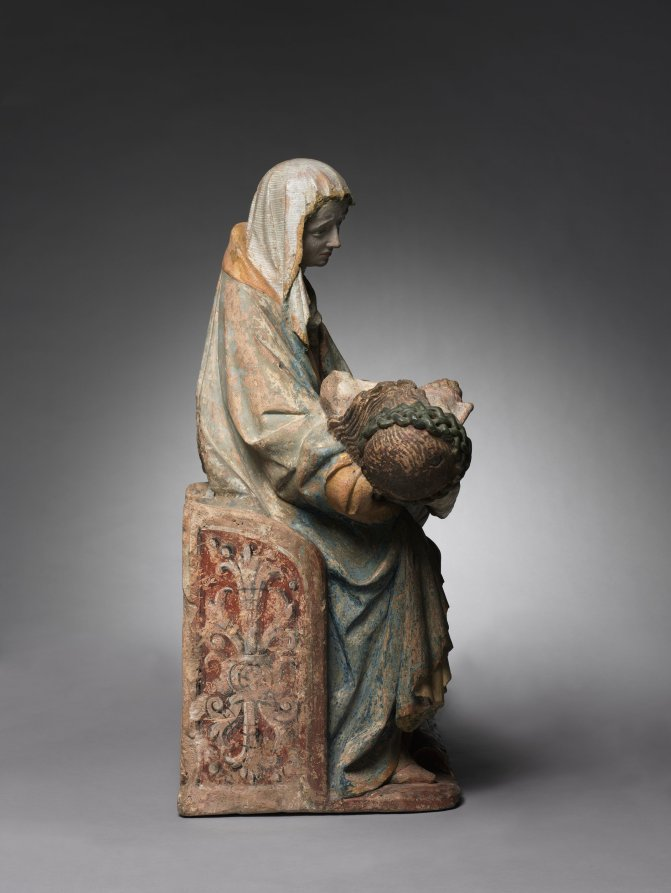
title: Vesperbild (Pietà)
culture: Austria, Steiermark, 15th century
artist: Master of Grosslobming (Austrian)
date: c. 1420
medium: painted cast stone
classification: Sculpture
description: The word vesperbild is the German word for pietà, the image of the Virgin Mary cradling her dead son on her lap. The theme has no literary source; it originated in Germany during the early 1300s and was more widespread in central Europe than in Italy. These devotional sculptures were used within the interior of a church, in small side chapels dedicated to the Virgin. As in this example, they often convey her grief in a sensitive way. For those who prayed before them, vesperbilds were poignant reminders of the Passion of Christ and the suffering of the Virgin.